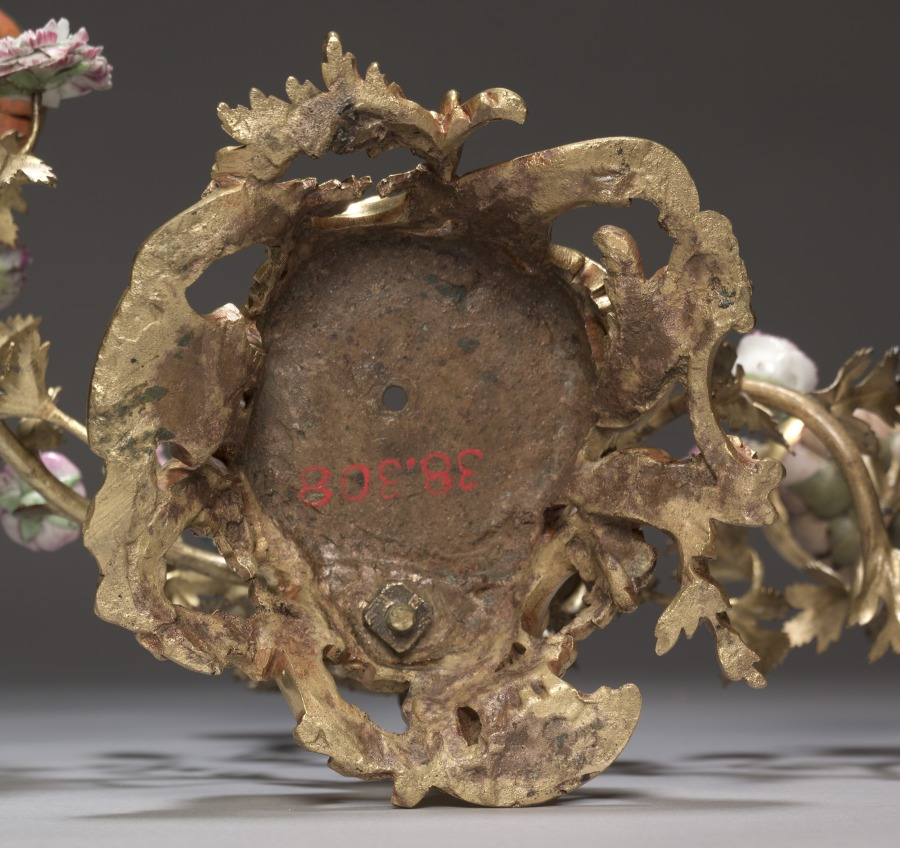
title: Candelabrum with Parrot (Candelabrum)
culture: France, style of Louis XV, 18th century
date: c. 1750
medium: gilt bronze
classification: Furniture and woodwork